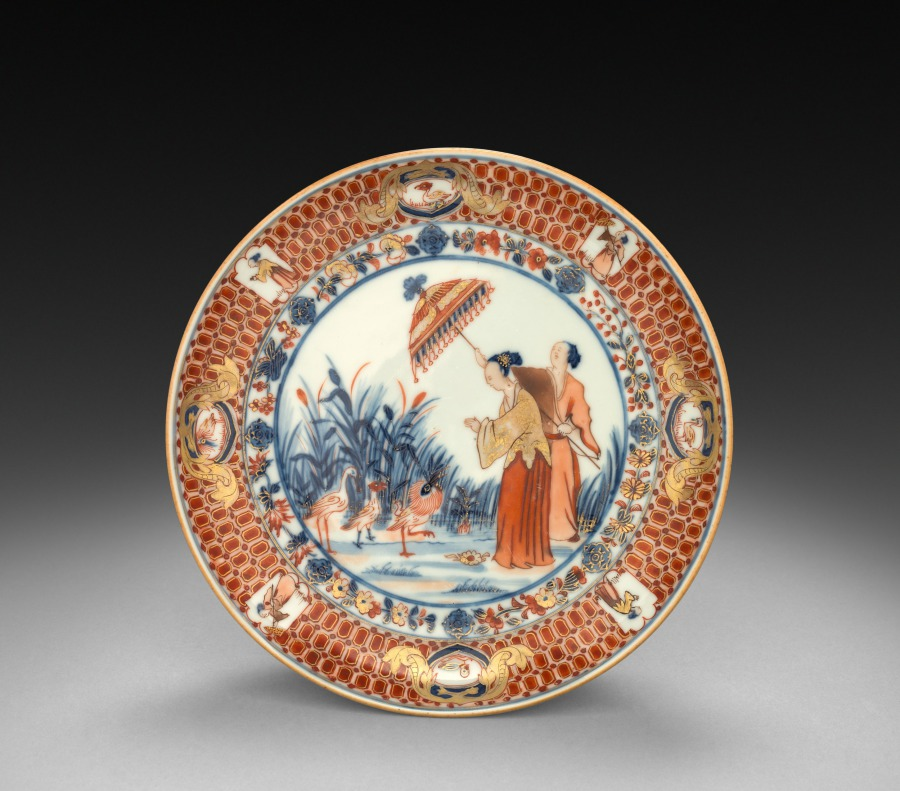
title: Saucer-shaped Dish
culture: China, Chinese Export -- Dutch Market, 18th century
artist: after a design by Cornelis Pronck (Dutch, 1691–1759)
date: c. 1750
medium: porcelain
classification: Ceramic